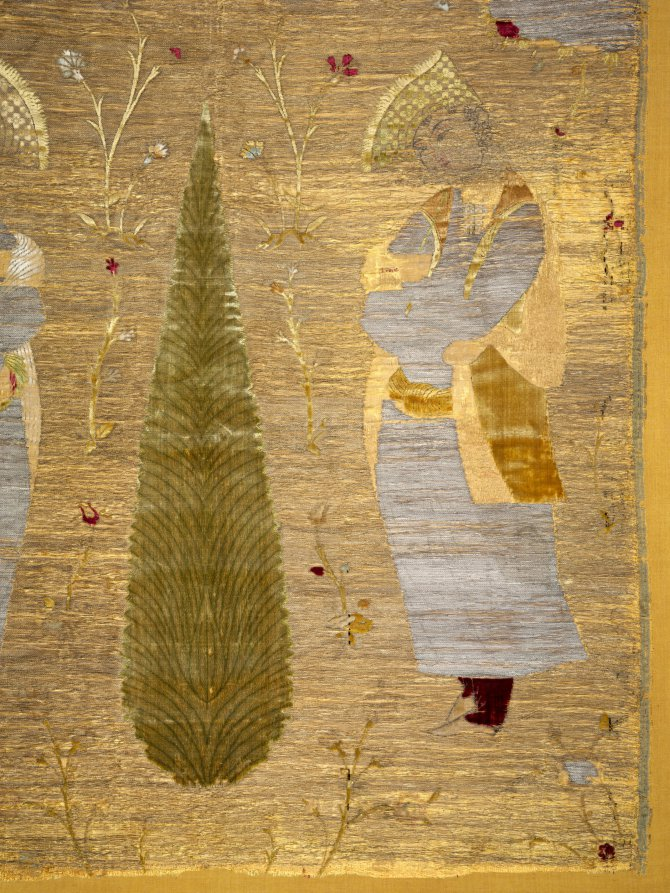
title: Velvet panel with four youths smelling flowers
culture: Iran, Isfahan or Yazd, Safavid period (1501-1722)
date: 1625–50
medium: Silk: velvet, brocaded, and pile-warp substitution; gilt- and silver-metal thread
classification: Velvet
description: A new style depicting single figures with limited modeling and European artistic influence was spearheaded by the Iranian painter Riza ‘Abbasi and adopted by textile designers in sumptuous brocaded velvets. Even with faded colors, this grand length retains ten colors of velvet pile, a feat that Iranian velvet weavers achieved by skillfully replacing colored pile warp during weaving, and thereby creating the most colorful velvets in the world. Elegant youths dominate the simplified outdoor setting here with diminutive cypresses and silver ponds on a ground originally covered with gold thread. Fashionably dressed young men wear wide-brimmed hats, silver robes, stole-like scarves, and knotted sashes that are symbols of status and rank.